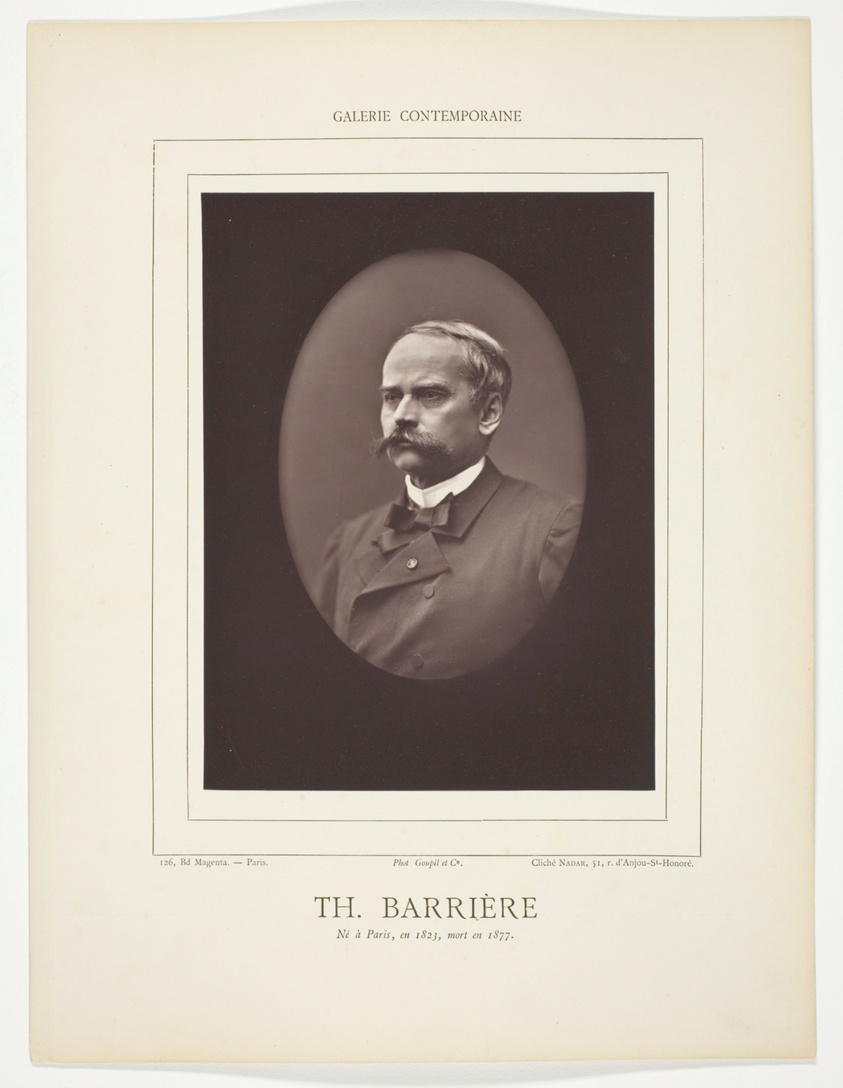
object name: Photograph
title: Theodore Barrière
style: 19th century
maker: Nadar (Gaspard Félix Tournachon) (French, 1820–1910)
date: c. 1853/73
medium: Woodburytype, from the periodical “Galerie Contemporaine Littéraire, Artistique” (1878), volume 5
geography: France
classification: woodburytype; photomechanical process; photography; photograph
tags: Collected by Hugh Edwards, portraits, portraits: male subject, photography, Paris, Contemporaine Littéraire